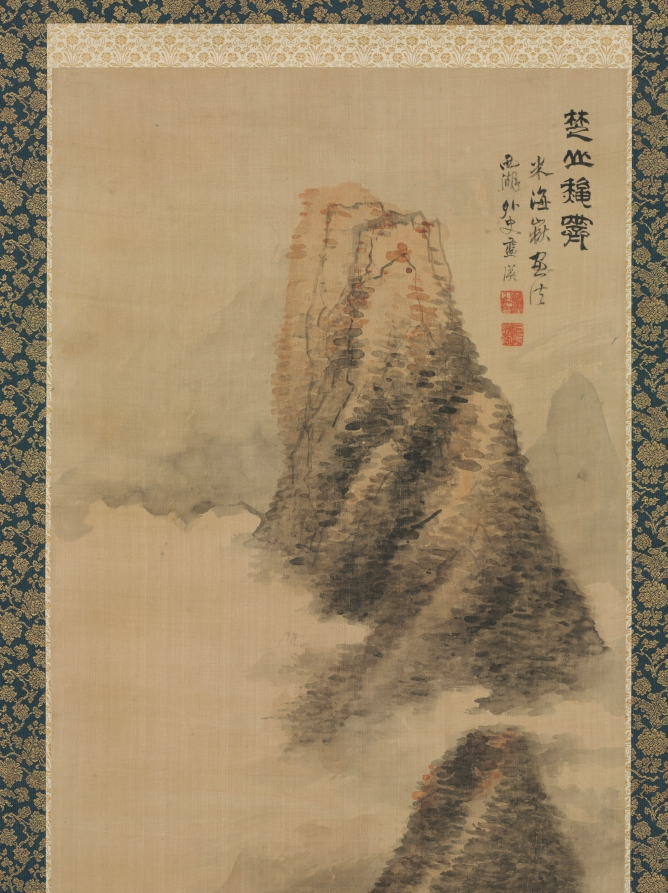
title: Clearing Autumn Mists in the Chu Mountains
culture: China, Ming dynasty (1368–1644)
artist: Lan Ying (Chinese, 1585–after 1664)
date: 1600s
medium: hanging scroll, ink and light color on silk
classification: Painting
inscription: Artist's inscription, signature, and 2 seals: Clearing Autumn Mists in the Chu Mountains, painted in the manner of Mi Haiyue [Mi Fu]. Xihu waishi, Lan Ying [seals] Lan Ying zhiyin; Shiwu toutuo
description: In his inscription Lan Yin states that he uses Mi Fu’s methods to depict this landscape. The ovoid "Mi" dots—Mi Fu’s brush idioms—are applied to give shape to the cloud-enveloped mountains and foreground tree grove for self expression. Engaging in the process of fang (imitation), he acquired the methods of various schools and masters to expand his technical range for creative transformations. Lan Yin developed his unique style and inspired major artists like Liu Du and Chen Hongshou.